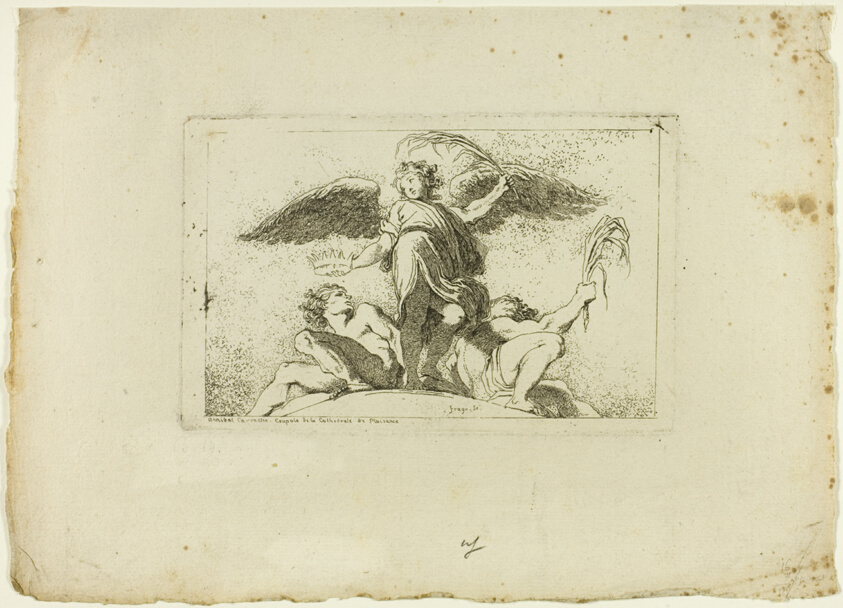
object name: Print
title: Angel Holding a Palm and a Crown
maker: Jean-Honoré Fragonard (French, 1732-1806); after Annibale Carracci (Italian, 1560–1609)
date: 1764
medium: Etching on ivory laid paper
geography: France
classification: etching; print; prints and drawing